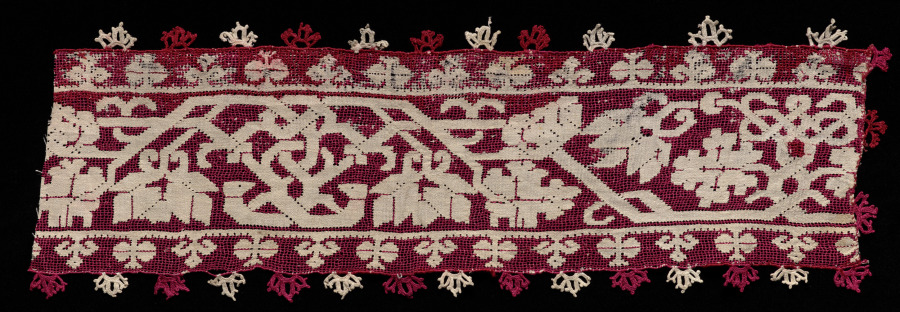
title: Band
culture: Italy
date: 1500–1699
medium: Linen: needle lace (drawnwork)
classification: Lace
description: In this fragment, the negative space (the background) is worked in red thread, leaving the positive space (the twining tendrils) the original neutral bleached linen color.